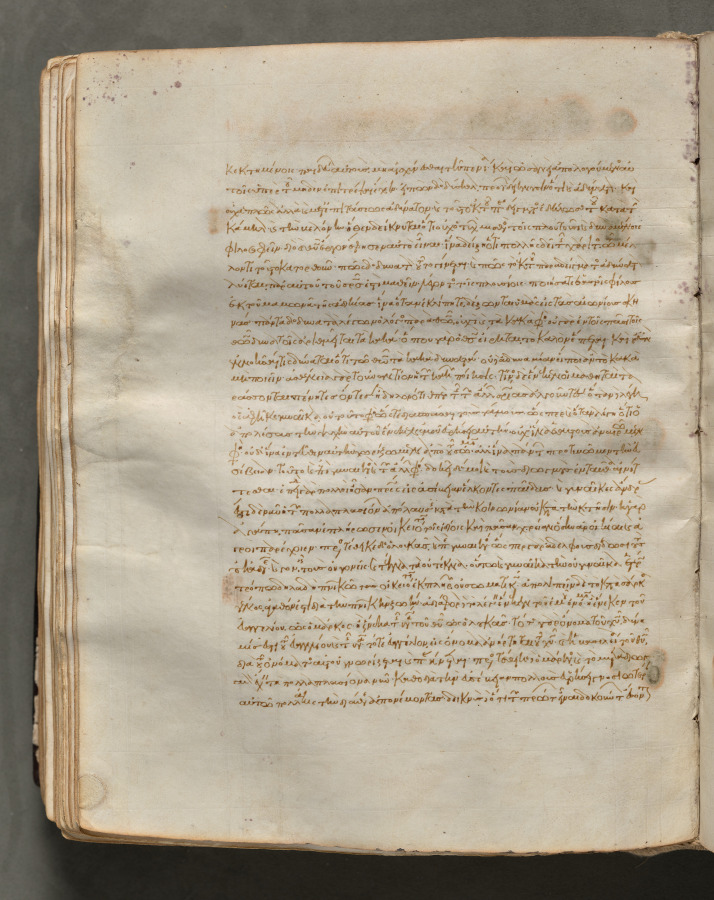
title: Text, folio 170 (verso), from a Gospel Book with Commentaries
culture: Byzantium, Constantinople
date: c. 1000–1100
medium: ink, tempera, and gold on vellum; leather binding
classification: Bound Volume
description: Each of the four gospels in this book opens on a page with brilliantly illuminated borders depicting the author of the text as well as birds-principally peacocks, symbols of the immortality of the soul-and fountains, representing the fountain of life and the salvation of the soul. This volume consists of 428 leaves with texts in Greek. Its level of sophistication suggests that it was probably written and decorated in a monastery in Constantinople.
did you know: Gospel Books were carried in procession through Byzantine churches.